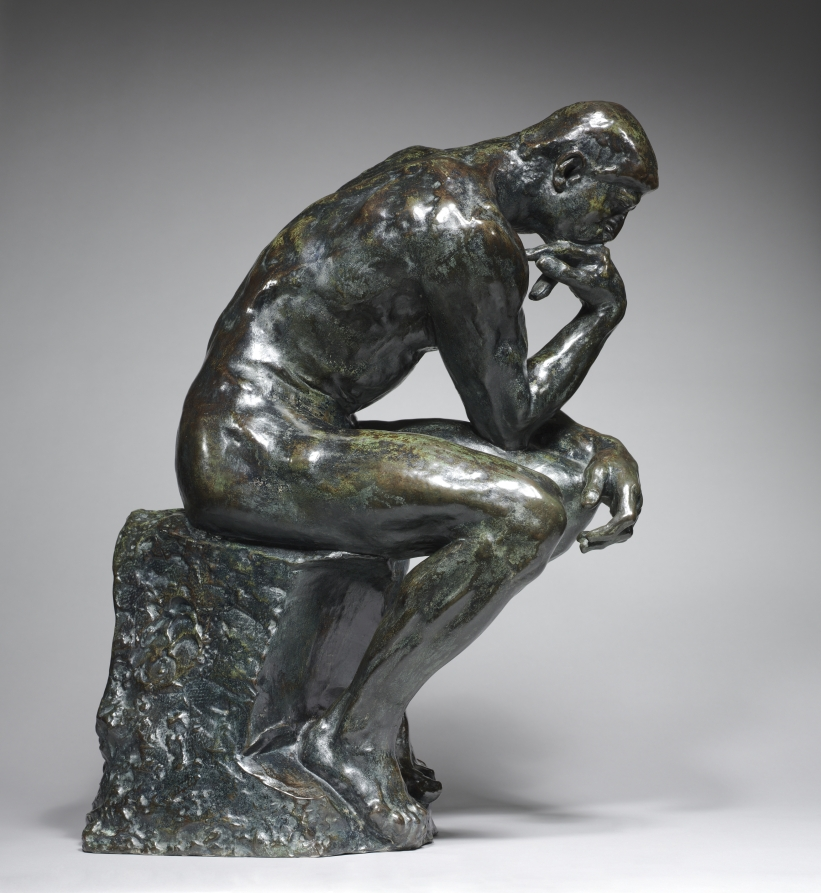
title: The Thinker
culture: France, 19th century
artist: Auguste Rodin (French, 1840–1917)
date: c. 1880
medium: bronze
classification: Sculpture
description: Rodin originally conceived The Thinker as a depiction of the Italian poet Dante Alighieri (1265–1321) sitting in the upper center of a monumental sculptural doorway titled The Gates of Hell (below). Inspired by Dante’s description of a journey through the underworld in his epic poem The Divine Comedy (about 1320), The Thinker contemplates mankind’s fate while gazing at a host of damned figures writhing in anguish below. Stripped of clothing, the figure’s rippling muscles convey an inner, animating life force symbolic of mental activity or creative effort. The figure leans forward, as if ready to spring from his perch, yet seems simultaneously caught in the inaction of deep thought. Rodin produced independent versions of The Thinker, first in this original size and later in a monumental version.